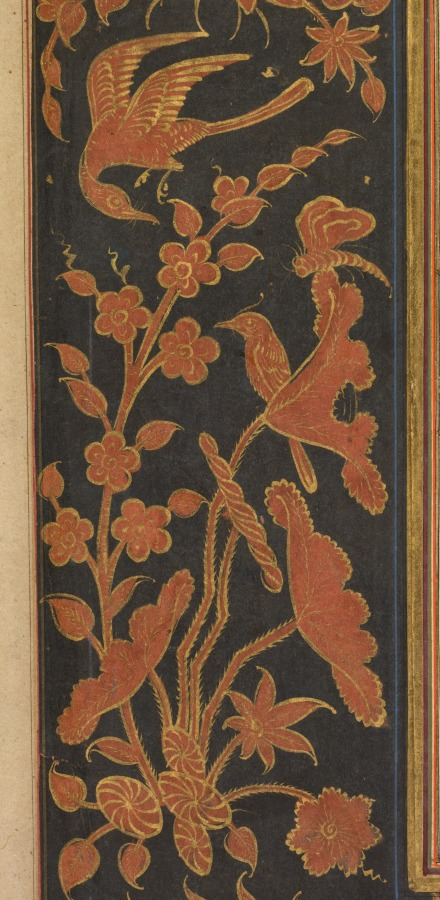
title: Folio B: Folio from the "Five Treasures" (Panj Ganj) of Jami (recto)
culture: Northern India, Mughal, early 17th century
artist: Mushfiq (Indian, active early 1600s)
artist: and others (Indian)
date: 1520–1607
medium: Gum tempera, ink, and gold on paper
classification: Painting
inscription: The miniature signed at upper left: ' amal - i Mushfiq sana 1015 (the work of the Mushfiq year 1015) Text on verso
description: This page contains two different texts, one written diagonally in the border and the other in the two central columns. The section of poetry in the border describes an episode from Joseph’s childhood in which his older brothers suggest to Jacob, their father, that they take Joseph into the countryside so that the boy can learn the area, although they actually plan to kill him. The poem in the central columns advises the reader to smile often, as a smile is sweeter and more pleasing than sugar.